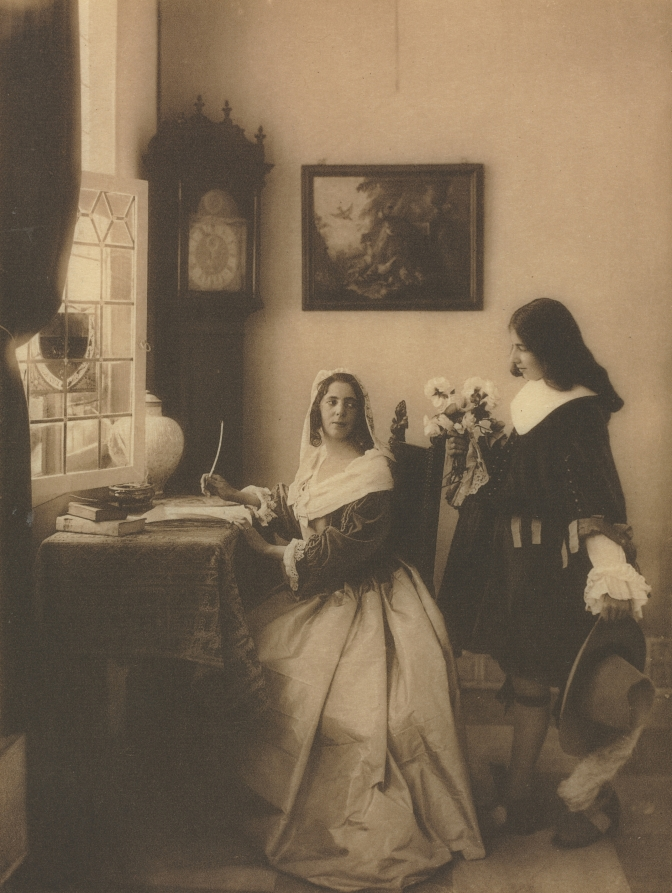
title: Camera Work: The Letter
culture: Italy, 20th century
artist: Guido Rey (Italian, 1860–1935)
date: 1908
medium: photogravure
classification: Bound Volume